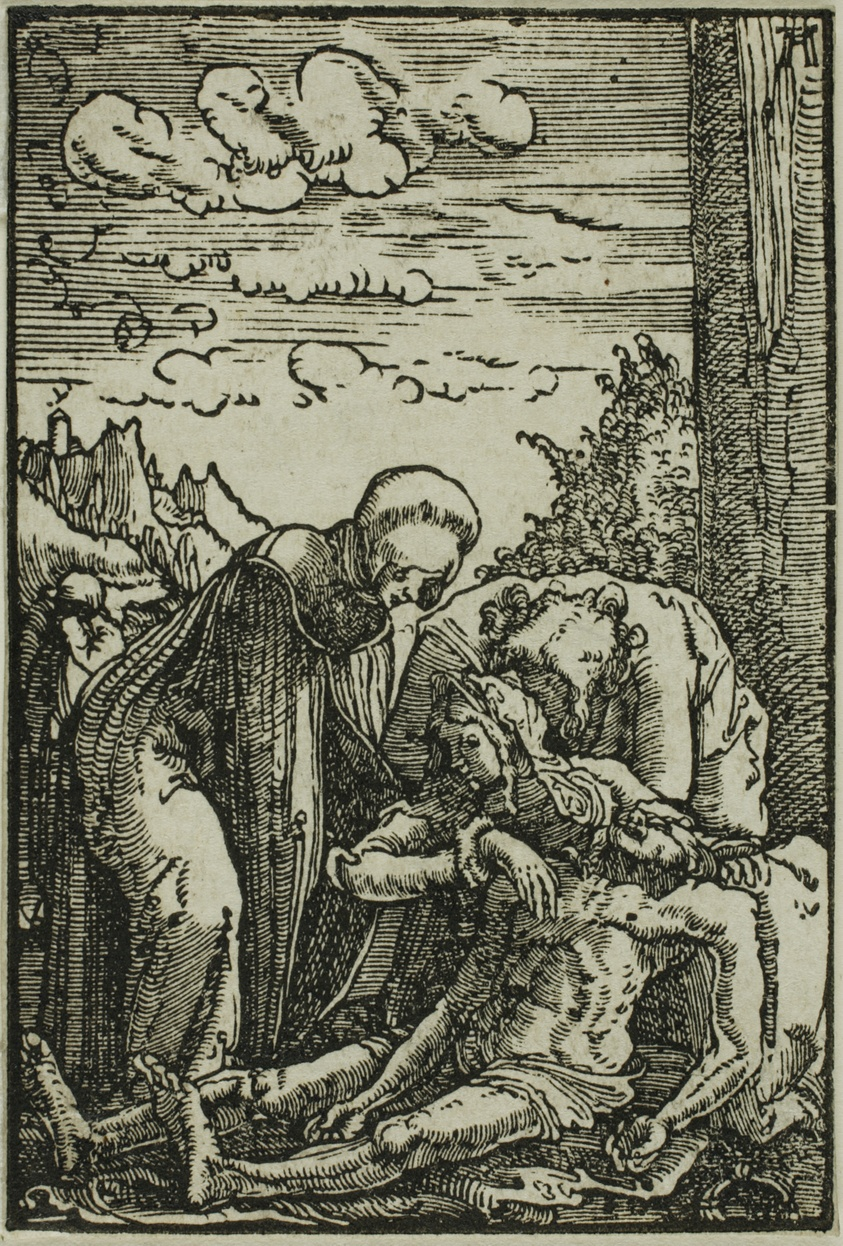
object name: Print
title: The Lamentation of the Virgin, from The Fall and Redemption of Man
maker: Albrecht Altdorfer (German, c.1480-1538)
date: 1513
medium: Woodcut in black on ivory laid paper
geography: Germany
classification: wood engraving; print; prints and drawing